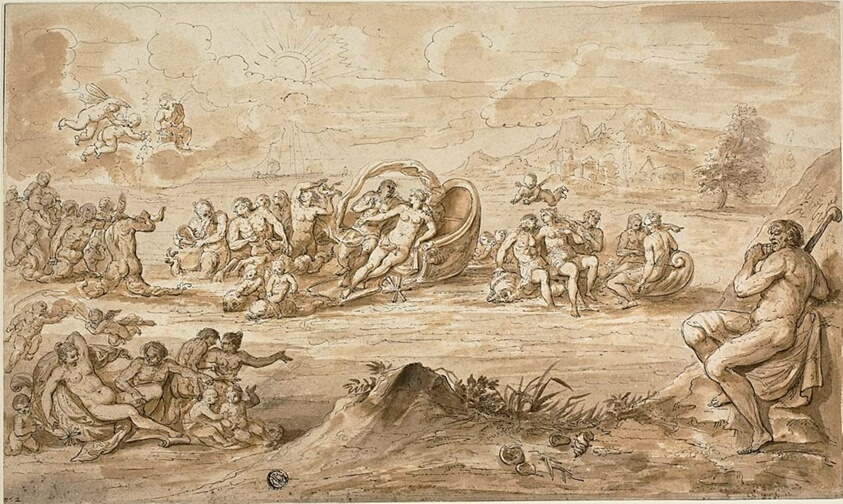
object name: Drawing and Watercolor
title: Acis and Galatea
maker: Attributed to Crispin van den Broeck; Netherlandish, c. 1524-1590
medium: Pen and black ink, with brush and brown wash, on ivory laid paper, laid down on ivory laid paper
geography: Netherlands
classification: pen and ink drawings; drawings (visual works); prints and drawing